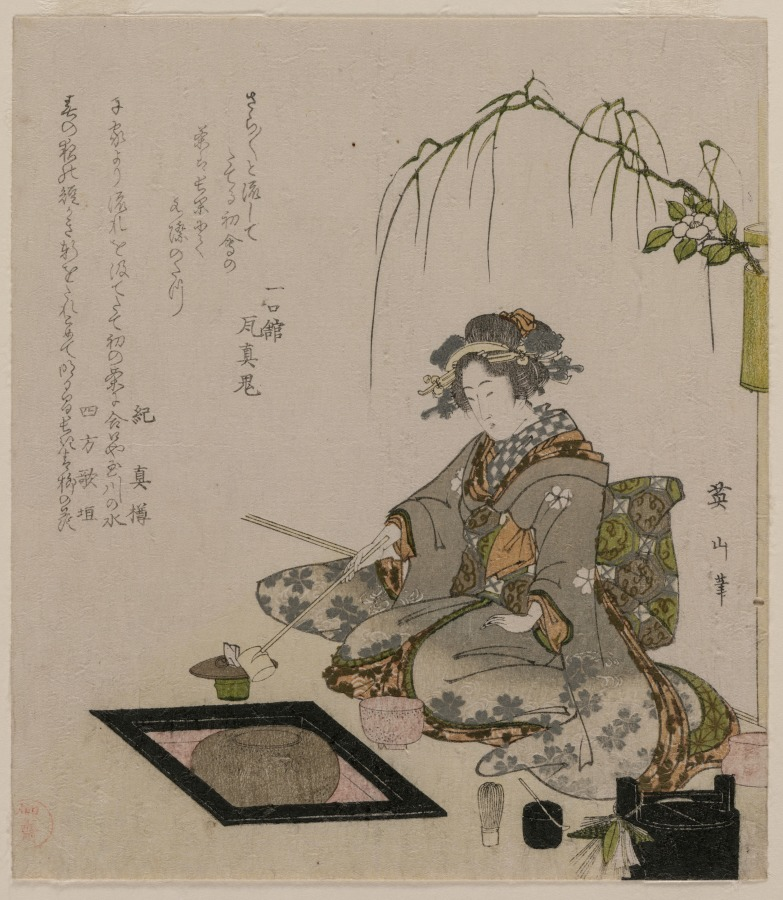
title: Woman Performing the Tea Ceremony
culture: Japan, Edo period (1615–1868)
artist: Kikukawa Eizan (Japanese, 1787–1867)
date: c. 1820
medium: color woodblock print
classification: Print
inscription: Signature: Eizan hitsu